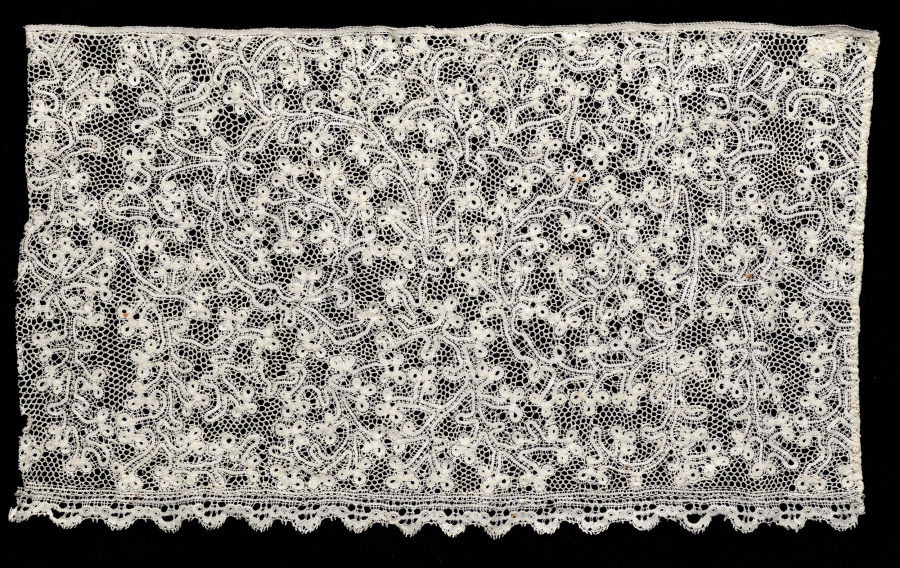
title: Fragment of Lace Flounce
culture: Italy, Milan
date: 1700s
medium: Linen: bobbin lace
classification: Lace